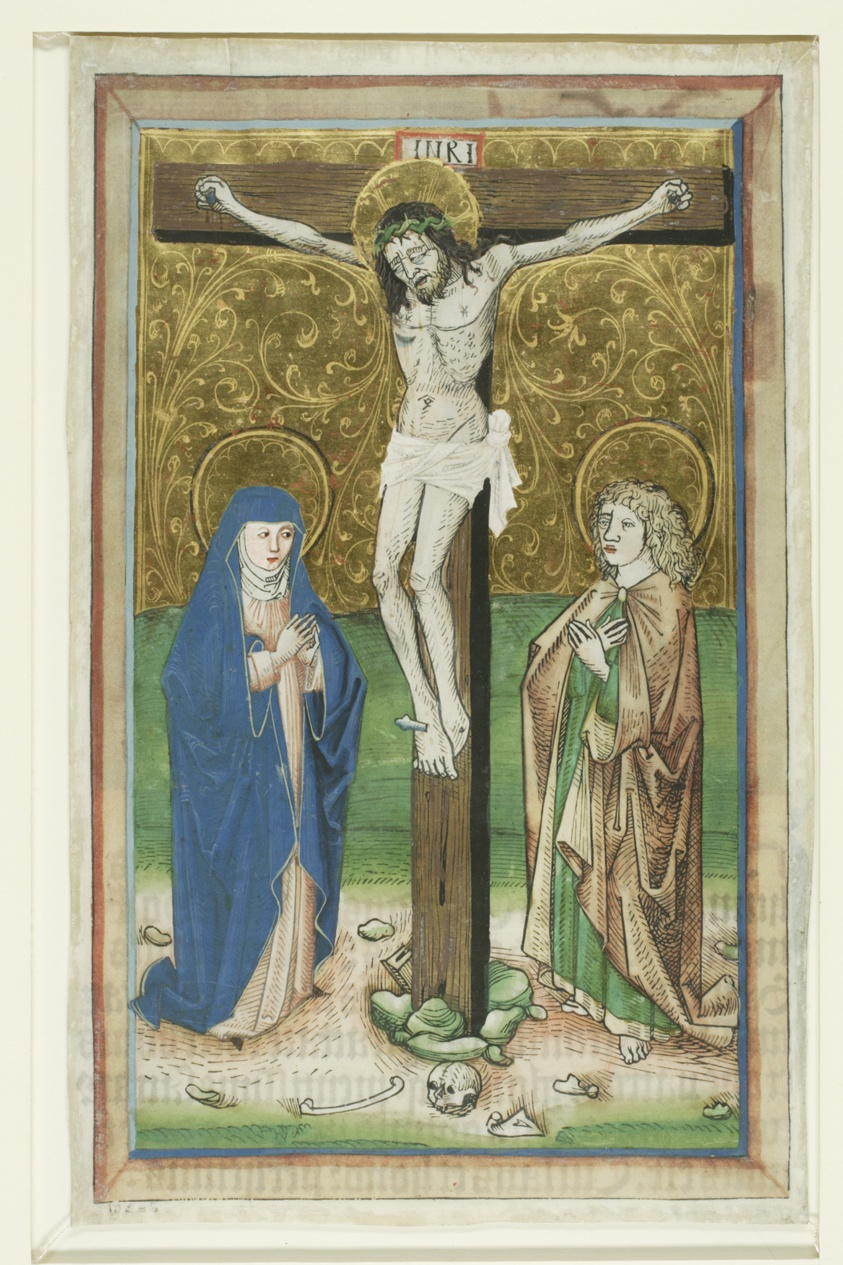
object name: Drawing and Watercolor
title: Crucifixion with the Virgin Mary and Saint John (recto); Saint Sebald with the Donors Paul Volkmayr and Sebald Schreyer (verso)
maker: Unknown Artist; German, 15th century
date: c. 1485–90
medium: Woodcut illuminated on vellum, with miniature on verso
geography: Germany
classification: woodcut; print; prints and drawing; drawings (visual works)